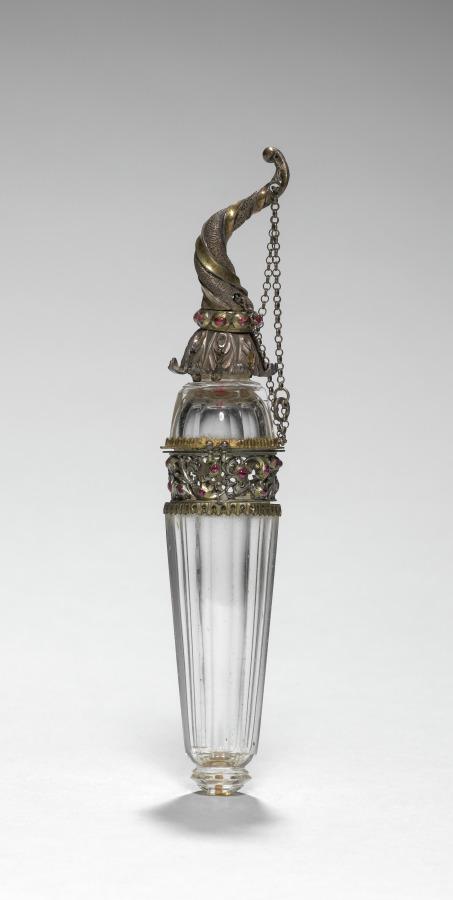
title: Scent Bottle (Vinaigrette)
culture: France, 19th century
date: 1800s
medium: glass mounted in silver (?) partially gilt and set with pink cabochon stones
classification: Miscellaneous